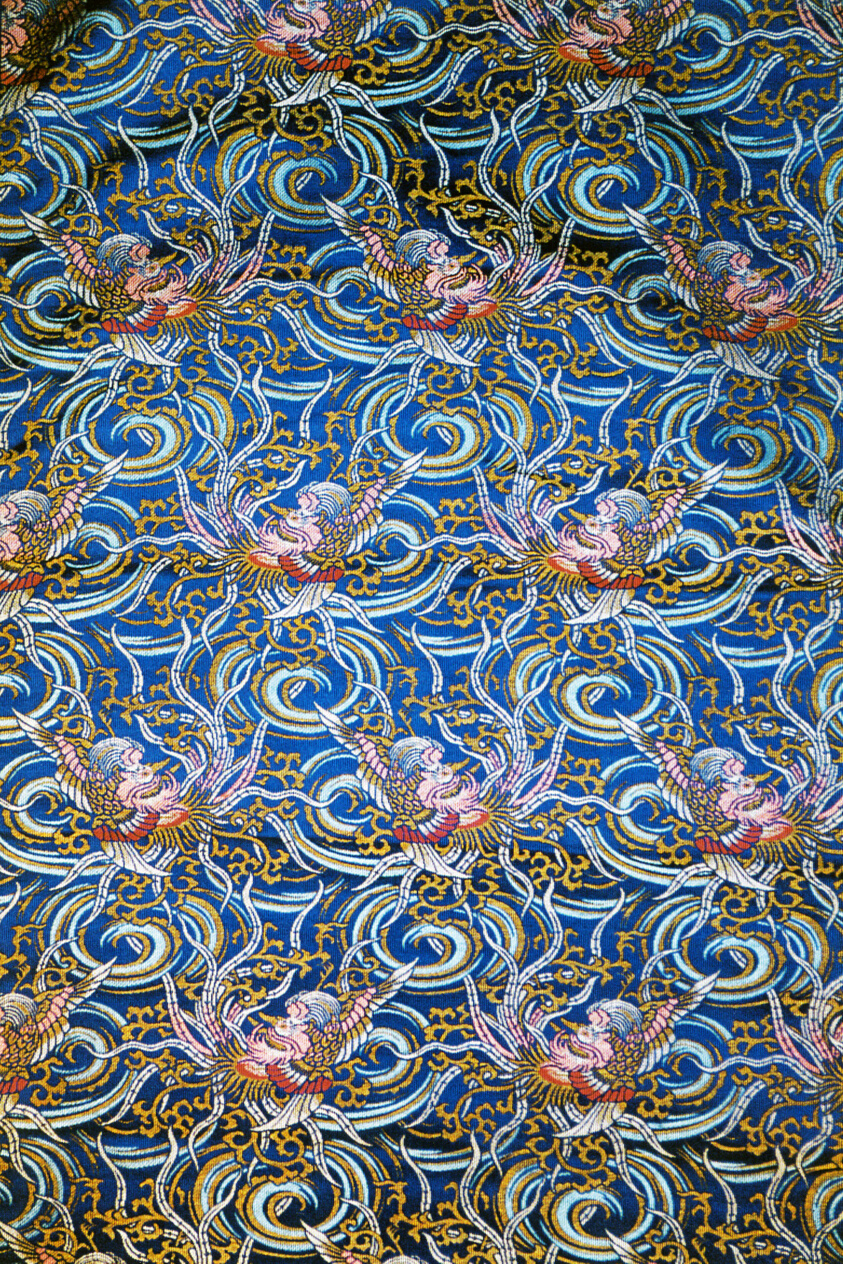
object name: Textile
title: Panel in Japanese Style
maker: Produced by Tassinari et Chatel, founded 1680; France, Lyon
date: 19th century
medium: Silk and cotton, warp-float faced 7:1 satin weave with weft-float faced 1:3 'Z' twill interlacings of secondary binding warps, supplementary patterning wefts and self-patterning ground weft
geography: Lyon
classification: weaving; textile